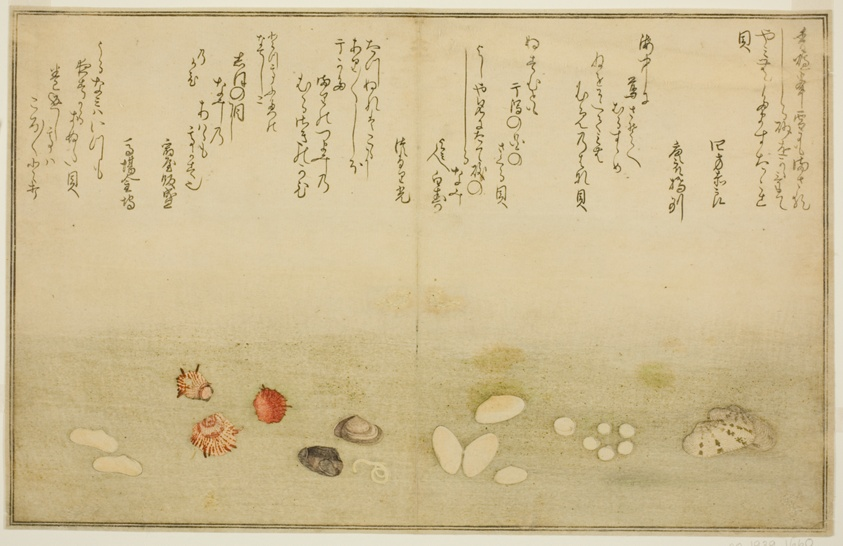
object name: Print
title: Sudare-gai, hana-gai, sakura-gai, mumeno-gai, nadeshiko-gai, and kinuta-gai, from the illustrated book "Gifts from the Ebb Tide (Shiohi no tsuto)"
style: Japanese (culture or style)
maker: Kitagawa Utamaro 喜多川 歌麿; Japanese, 1753 (?)-1806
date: 1789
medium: Color woodblock print; double-page illustration from book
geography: Japan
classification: woodblock print; print; asian art